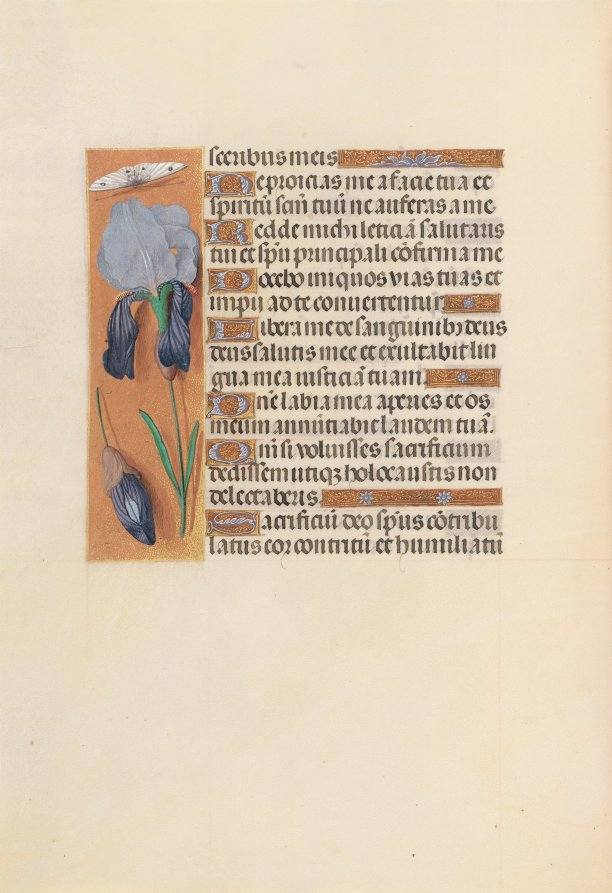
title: Hours of Queen Isabella the Catholic, Queen of Spain: Fol. 247v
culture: Flanders, Ghent and Bruges, late 15th century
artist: Master of the First Prayerbook of Maximillian (Flemish, c. 1444–1519)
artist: and Associates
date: c. 1500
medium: ink, tempera, and gold on vellum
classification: Bound Volume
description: This manuscript was illuminated by a circle of at least five highly organized manuscript painters active in the Flemish cities of Ghent and Bruges. The principal illuminator was Alexander Bening, who painted the majority of the book's miniatures. Manuscripts produced by this circle of artists are renowned for the decoration of their borders, which typically feature a rich variety of realistically-painted flowers, birds, and butterflies. This prayer book, called a book of hours, was intended not for a cleric, but for the private devotions of a lay person-in this case, Isabella the Catholic, Queen of Spain (1451-1504). Isabella's coat of arms embellishes the book's frontispiece. It is unlikely that the book was commissioned by the Queen herself; rather, she probably received it as a diplomatic gift from someone courting her patronage, perhaps Cardinal Francisco Jimenez de Cisneros. A Franciscan friar, Jimenez was dependent upon Isabella for his advancement, first to the post of Queen's confessor in 1492, and then to Archbishop of Toledo in 1495.